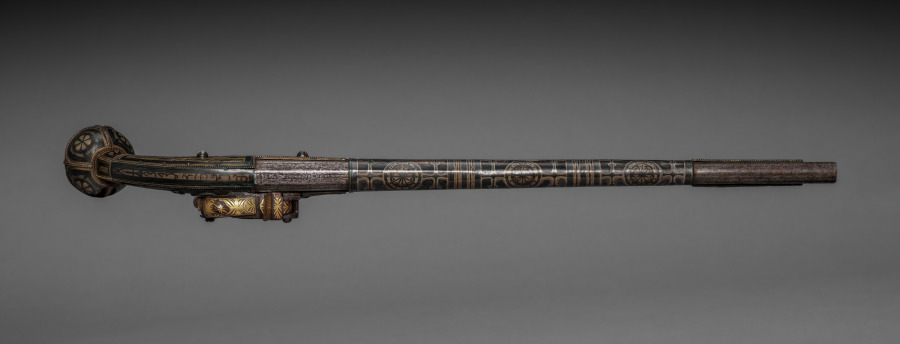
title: Ball-Butted Miquelet-Lock Pistol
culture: Caucasus, Daghestan, 19th century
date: c. 1850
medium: steel, brass, silver; gold inlay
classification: Arms and Armor